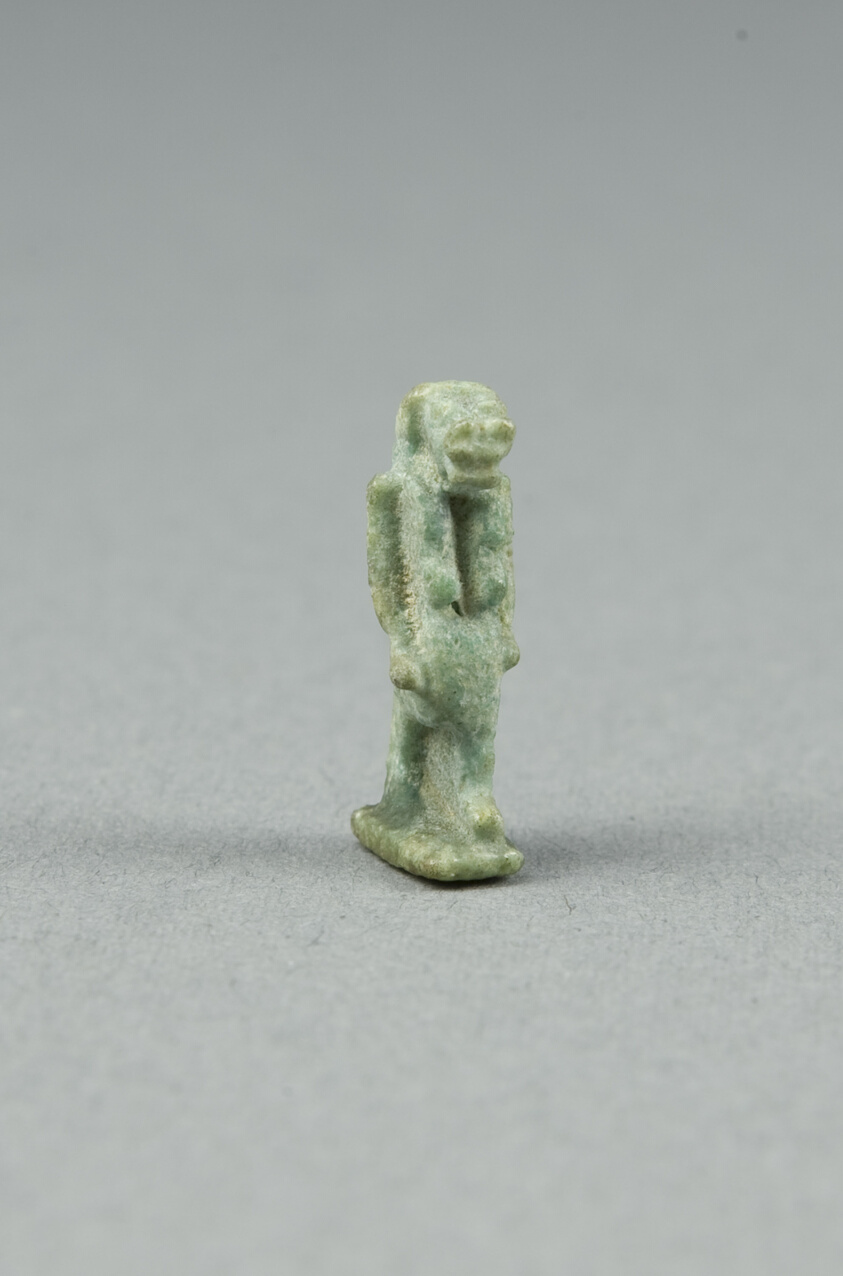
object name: Costume and Accessories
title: Amulet of the Goddess Taweret (Thoeris)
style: egyptian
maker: Egyptian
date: Third Intermediate Period–Late Period, Dynasties 21–31 (about 1069–332 BCE)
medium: Faience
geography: Egypt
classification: amulet; jewelry; ceramics; ancient art; costume; faïence (composite material)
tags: goddesses